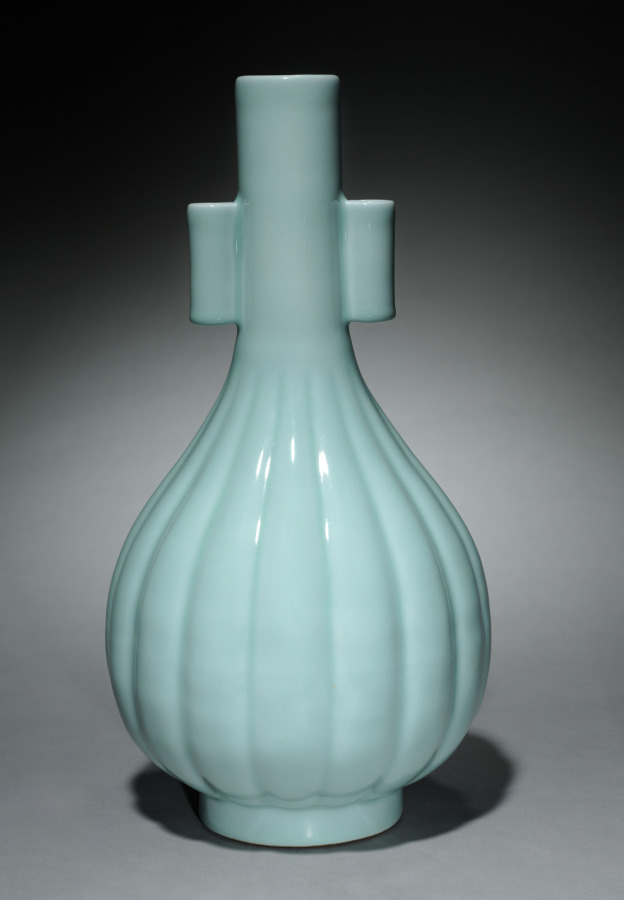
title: Melon-Shaped Fluted Vase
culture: China, Jiangxi province, Jingdezhen kilns, Qing dynasty (1644-1911), Qianlong mark and reign (1736-95)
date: 1736–95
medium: porcelain with clair-de-lune glaze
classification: Ceramic